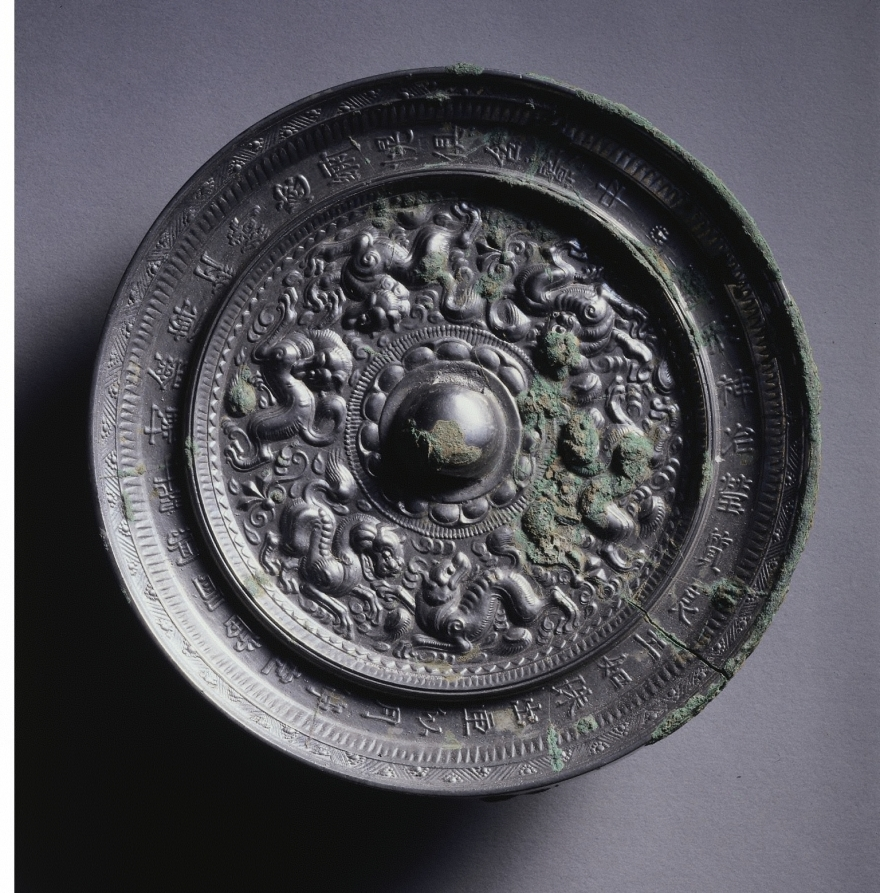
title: Mirror with Three Pairs of Bixie around a Loti-form Knob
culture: China, Tang dynasty (618-907)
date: mid-600s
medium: bronze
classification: Metalwork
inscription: 錬形神冶，瑩質良工。如珠出匣，似月停空。當眉寫翠，對臉傳紅。綺窗繡幌，俱含影中。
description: The casting of this mirror is precise. The central knob is surrounded by 16 petals to assume the appearance of a lotus blossom. In the inner circle, the three pairs of bixie, mythological animals, are displayed in fuller relief and sense of organic coordination than animals in earlier Sui period mirrors, which are slender in proportion and lissome in appearance. The outer circle has a poetic inscription: The spirit merges with the forms that are being wrought. The lustrous metal matches the exquisite craftsmanship. Like a pearl, it emerges from the container box— A virtual moon suspended in the firmament. [It enables] the lady to draw her eyebrows And apply rouge to her face. Even those elegant windows and the embroidered curtains: Can all be reflected within.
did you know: A bixie is a fantastical hybrid creature that was believed to ward off evil spirits.